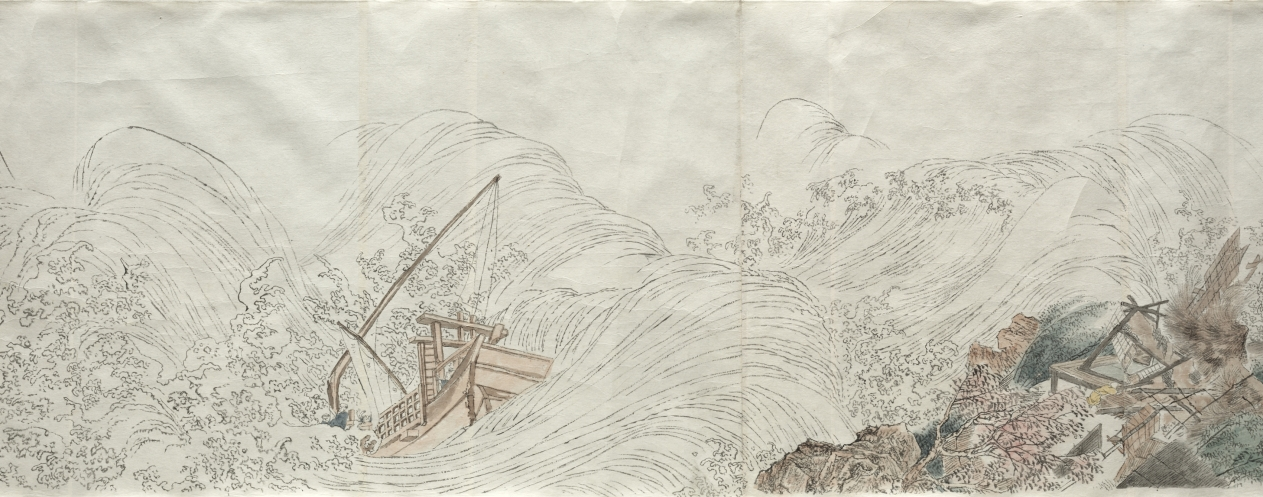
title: Sketch Copy of Natural Disasters, from the Seven Fortunes and Misfortunes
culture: Japan, Edo period (1615–1868) to Meiji period (1868–1912)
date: after 1773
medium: handscroll; ink and color on paper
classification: Painting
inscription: Signed: Gettcho; dated 1773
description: This unmounted handscroll is a copy of the first of a three-scroll set painted by Maruyama Ōkyo (1733–1795) for Buddhist monk Yujō (1723–1773). It depicts people's unfortunate encounters with forces of nature from wind to beasts. Ōkyo's realistic, contemporary imagery was meant to evoke a sense of recognition and empathy in viewers, shocking them into avoidance of possible punishments.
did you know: Notations that appear throughout the scroll indicate colors and other details of the original painting.